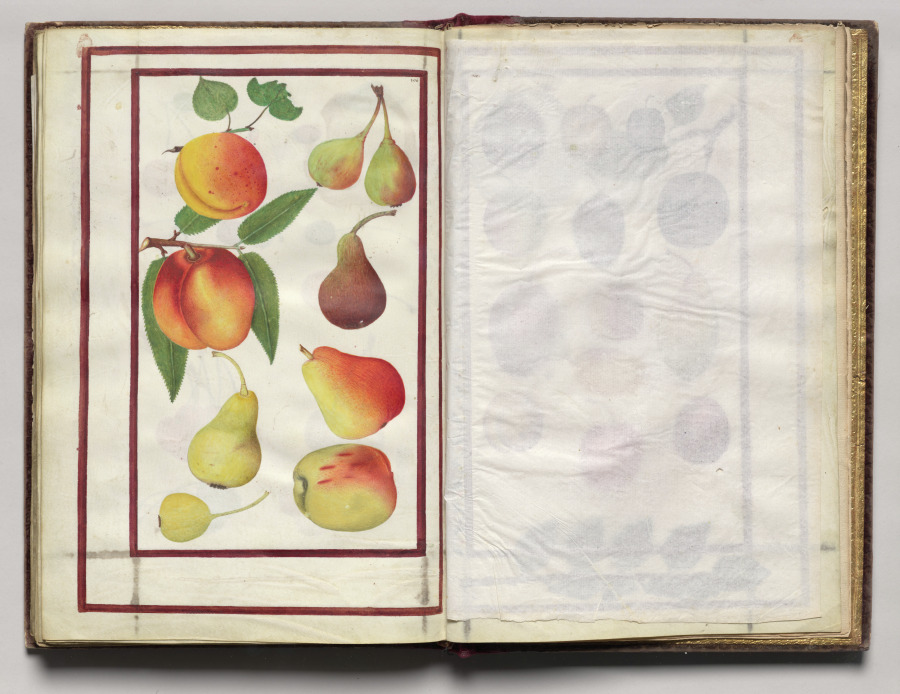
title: Peaches, Pears, and Figs, folio 47 (verso), from Florilegium (A Book of Flower Studies)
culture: France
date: 1608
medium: watercolor, ink, silver, and gold over occasional traces of pencil, on vellum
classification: Bound Volume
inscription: Dated: Poitiers 1608 (on frontispiece) Signed: On frontispiece in black ink, lower right: Van Kuyk Notation on drawing: Frontispiece: in pencil, lower margin: * élève de Van Kessel, peintre flammand (* in pencil also appears in front of Van Kuyk's name).